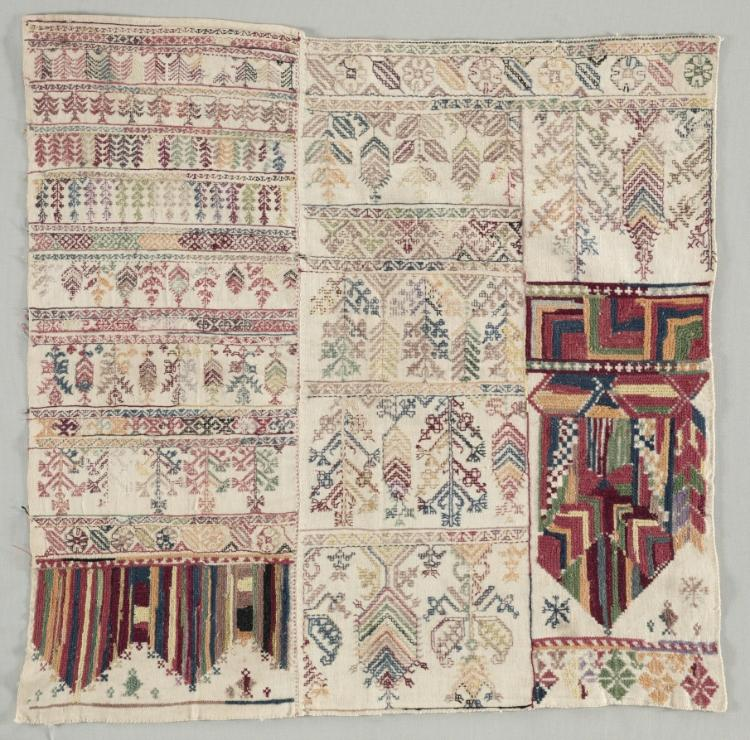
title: Embroidery sampler (chelliga/shelliga)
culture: Africa, North Africa, Morocco, Moroccan embroiderer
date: c. 1700s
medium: Cotton, silk, dye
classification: Sampler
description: These detailed samplers demonstrate the artist's technical range. Here, floral designs, protective open-palm hand motifs (khamsa) and various patterns are embroidered using double-running stitches, straight stitches, and long-armed cross stitches with dyed silk thread. Young women from all social classes would learn these skills from a master craftswoman (mu'allima), who taught within her home.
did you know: Upon completing their training, professionally-trained young women would produce a sampler as a "diploma" testifying to their embroidery skills.